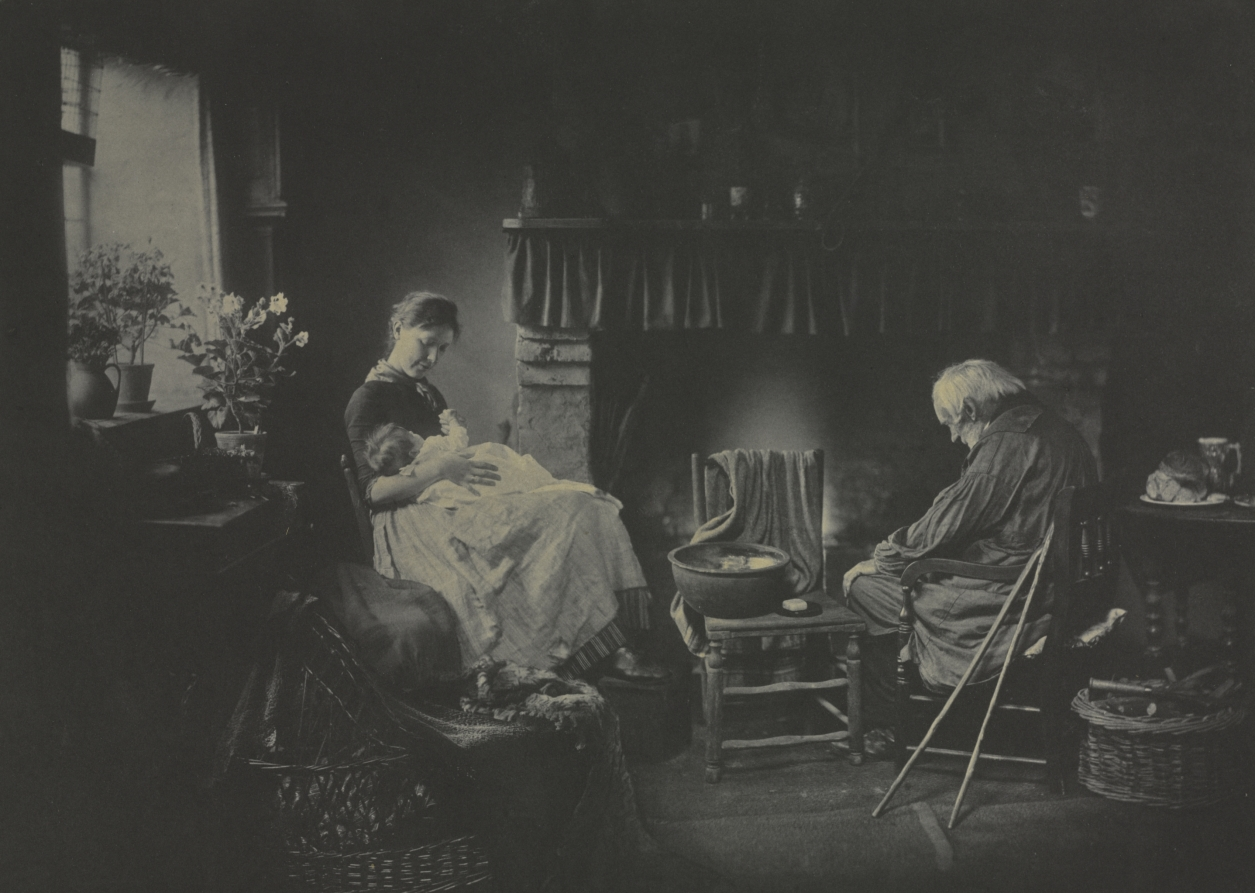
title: Dawn and Sunset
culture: England, 19th century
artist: Henry Peach Robinson (British, 1830–1901)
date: 1885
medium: platinum print from glass negative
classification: Photograph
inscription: written in pencil on recto of primary mount: "Henry P. Robinson/ Ludlow Mills"; on secondary mount: "Dawn and Sunset"; on verso: "France Esq/ S (?) alop Old Bank/ 1-1/2 oak + (?) slip of =Wednesday"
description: Henry Peach Robinson was a pioneer in the "combination printing" technique, employing a number of negatives to make one photographic print. Keenly interested in portraying picturesque narrative scenes and landscapes, he carefully staged elaborate tableaux, often relying on relatives to serve as models. In Dawn and Sunset he presented a symbolic portrayal of three generations, from infancy to old age. By using the combination method, he was able to exercise greater control over his subjects' poses, gestures, and expressions than would have been possible with a single exposure. The smaller, platinum print version provides an instructive example of how an artist's vision can change when a different process is used to print the same negative. The platinum process provided a warmer, more subtle tonal range than the albumen process. The larger, albumen print appears almost journalistic in its use of harsh, even lighting, whereas in the platinum print Robinson was able to hide many details in dark shadow. This created a sense of unity that is missing in the larger image.